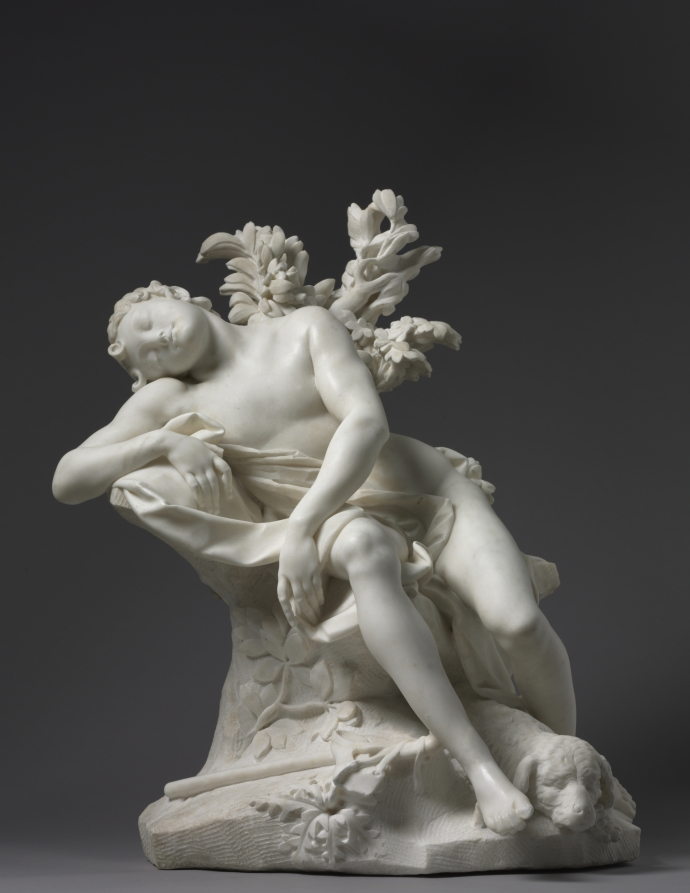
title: Sleeping Endymion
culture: Italy, 18th century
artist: Agostino Cornacchini (Italian, 1686–1754)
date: 1716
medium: marble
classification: Sculpture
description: Cornacchini moved away from the dramatic movement and light effects characteristic of baroque sculpture toward a calmer, gentler, more graceful style favored by 18th-century taste. This sculpture depicts Endymion, a beautiful young shepherd from Greek mythology. His beauty so entranced Selene, the personification of the moon, that she asked Zeus to grant Endymion immortality. Zeus did so, but only after placing Endymion in an eternal sleep.